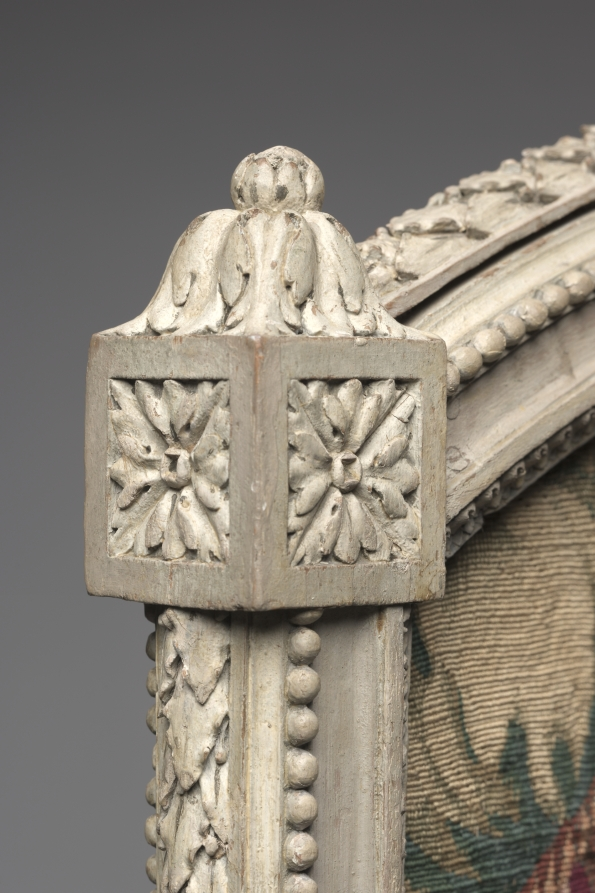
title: Fire Screen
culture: France, Paris, style of Louis XVI, 18th century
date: c. 1785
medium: carved and painted wood with tapestry panel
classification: Furniture and woodwork